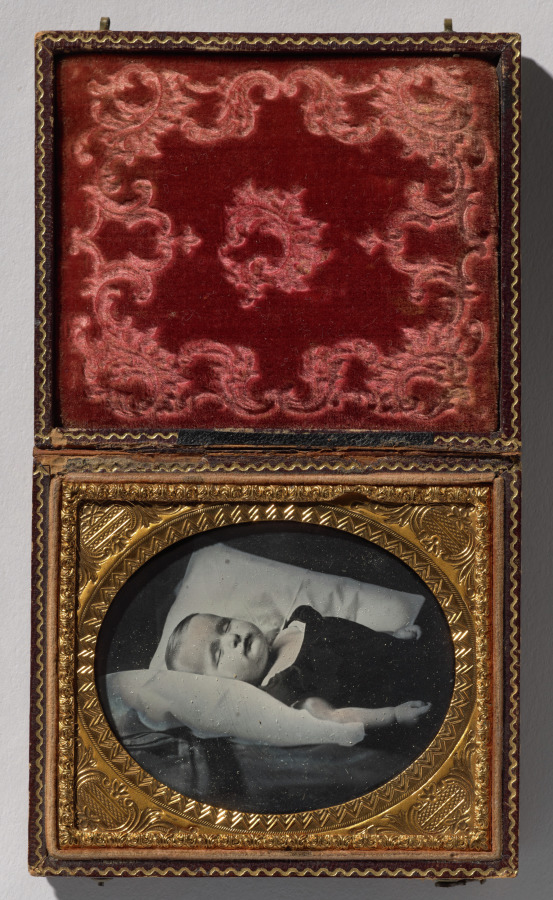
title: Post-Mortem on Pillow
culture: America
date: c. 1855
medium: ambrotype, tinted, sixth plate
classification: Photograph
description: Children have always been particularly cherished subjects for photography. Portraits were made to preserve the memory of their stages of growth and, in an age when long-distance travel was rare, to share with faraway relatives. And, for a sadder reason: in 1840 an estimated one-third of children died before age five. Photography offered grieving parents the opportunity to immortalize their children’s features. This tragic genre of photographs, later called “post-mortems,” often depicts the children in fine clothing, laying down with eyes shut, as if merely napping.